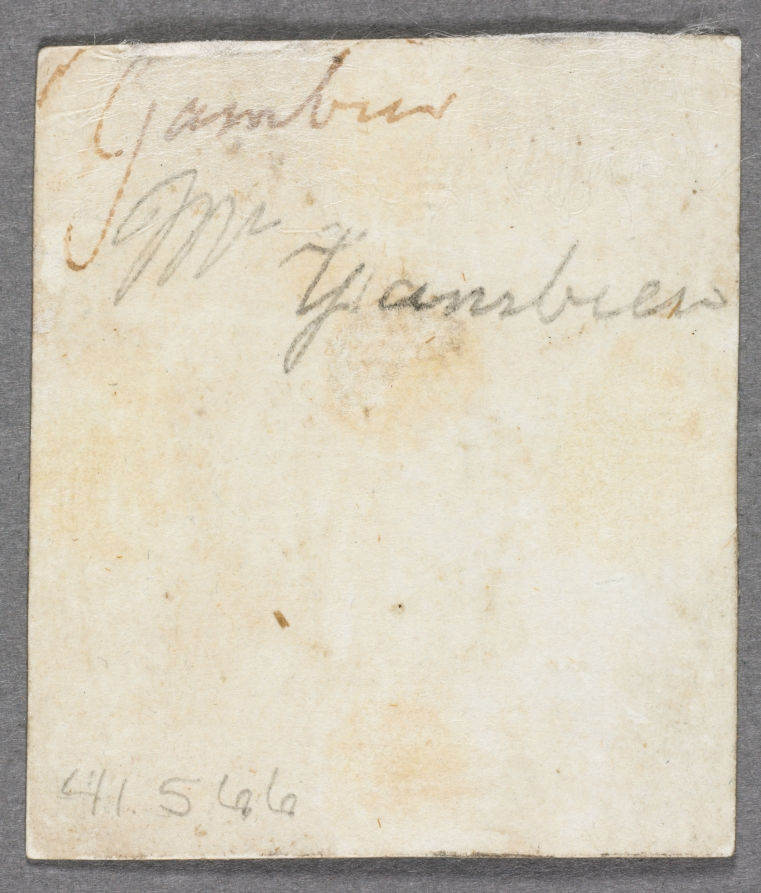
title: Portrait of Mr. Gambier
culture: England, 18th century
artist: John I Smart (British, 1741–1811)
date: c. 1776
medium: graphite and wash on laid paper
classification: Portrait Miniature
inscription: Signature: none; inscribed in graphite on front of paper at upper right corner: [?][?]2; inscribed on paper backing: in graphite, upside down at upper left: 15; in graphite, on a slant at left center to upper right: Mr. Fitzherbert; inscribed on back of paper in graphite: Mr. [Gambier]; inscribed in brown ink: Gambier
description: Although it is impossible to say if it was always part of the artist’s process to execute a preparatory sketch prior to painting each miniature, we do know that John Smart retained many hundreds of these sketches. A group of preparatory sketches—of which this portrait is one—descended through the Smirke family after Smart’s daughter Sarah gave a sketchbook containing preparatory portrait studies to her friend Mary Smirke, sister of the celebrated Victorian architect Sydney Smirke. This book was probably broken up around 1877 when it was divided between Sydney’s daughters Mary Jemmett and Mrs. Lange, whose portions were both sold at auction in 1928. G. C. Williamson was the first to suggest that Smart’s sketches were well known and that they were preparatory studies for the painted miniatures. Williamson listed the names of sitters from the sketches known to him at the time, and they include Mr. Fitzherbert, the identification formerly given to the sitter in this portrait. Here, the sitter’s head and shoulders are facing left. He has brown eyes and wears his powdered hair en queue. His coat has a narrow collar, under which he wears a high stock collar and frilled vest. The color of his attire is not suggested, and the background remains unpainted. Though long catalogued as Mr. Fitzherbert, the portrait was likely mistakenly designated as such at a later date. There has been confusion regarding several miniatures called Mr. Fitzherbert, which may or may not be related. There was a sketch of a different Mr. Fitzherbert in the Jemmett sale of February 29, 1928; another in the Burton-Jones collection by the 1940s; and a miniature of a Mr. Fitzherbert portrayed nearly full face and dated 1771 was sold at Sotheby’s, London, on August 1, 1934 (lot 73). The present location of these unpublished miniatures is unknown, as is their credibility as portraits of the Mr. Fitzherbert that Smart is known to have painted. When the paper backing of the Cleveland miniature was removed in 1993, the name Gambier was discovered inscribed in graphite and pen on the back. This miniature relates to a portrait of a man on ivory dated 1774, formerly in the Ashcroft collection and at one time on loan to the Victoria and Albert Museum. It was sold at Sotheby’s, London, on May 7,1946 (lot 61) and catalogued as a “miniature of a young man, by John Smart, signed and dated, head and shoulders three-quarters sinister, gaze directed at spectator, fair hair en queue, in white cravat, frilled vest and rich red coat, 1 3/8 in.” The size of the portraits correspond, though the ivory miniature represents less of the figure than is seen in the sketch and is therefore smaller. While the color red for the coat is not indicated in the sketch, Smart often left the dress of his male sitters plain in preparatory sketches. Thus, this currently unlocated miniature on ivory can be identified as Mr. Gambier. Research into the identity of this gentleman is ongoing.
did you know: Sketches helped John Smart work out the particulars of a portrait before commencing the miniature on ivory; they were useful in the event that a duplicate might later be required.